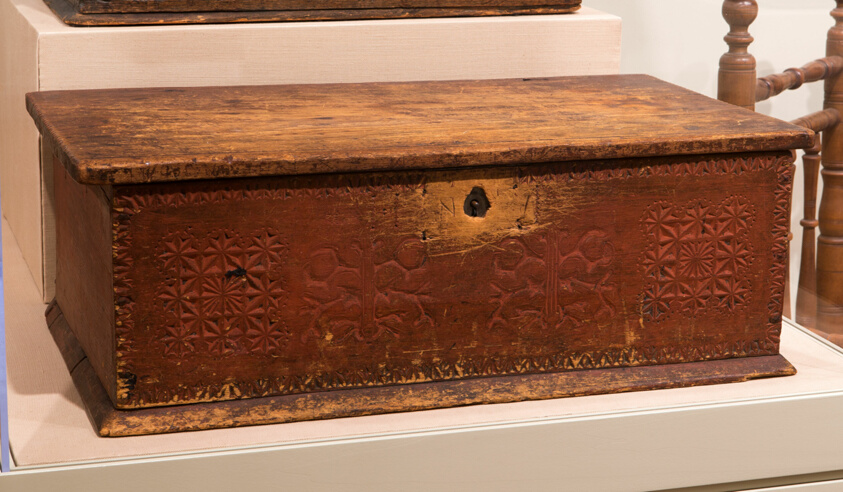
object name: Decorative Arts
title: Box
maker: Artist unknown (American, 17th–18th century); New Hampshire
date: 1674–1700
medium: White pine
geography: New Hampshire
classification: case furniture; box; furniture; american decorative arts; american arts; decorative arts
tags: furniture